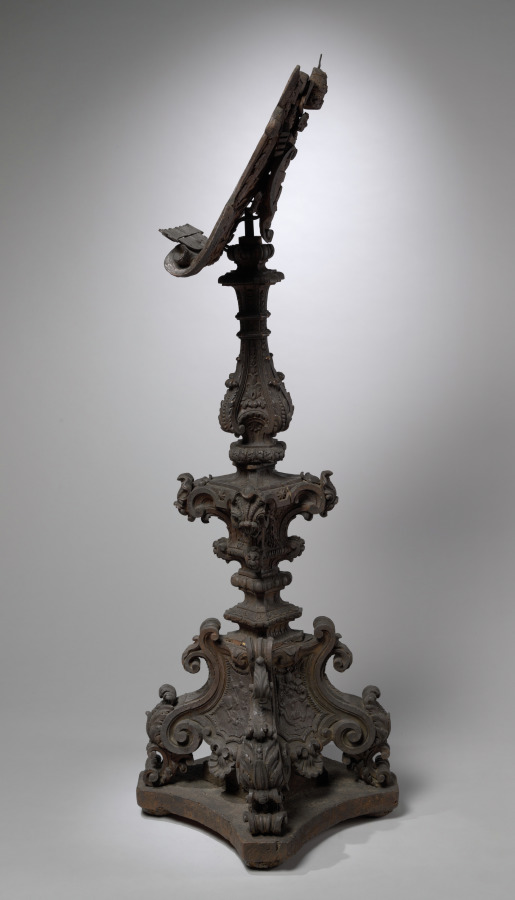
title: Lectern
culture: Italy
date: 1707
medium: wood and gesso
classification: Furniture and woodwork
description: Lecterns of this type were used in Roman Catholic churches and monastery chapels to hold the Bible, from which a priest would read the lessons of scripture and at some points during the liturgy, guide the participants in prayer. The high degree of decoration was achieved by applying plaster gesso to the wooden base allowing for elaborate carving in the same way that a picture frame is worked. Sometimes lecterns bearing the arms of a pope or cardinal like this one were gifts to mark the visit or favor of that official.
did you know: The carved coat of arms on the lectern desk are those of Pope Clement XI, who reigned from 1700 to 1721.